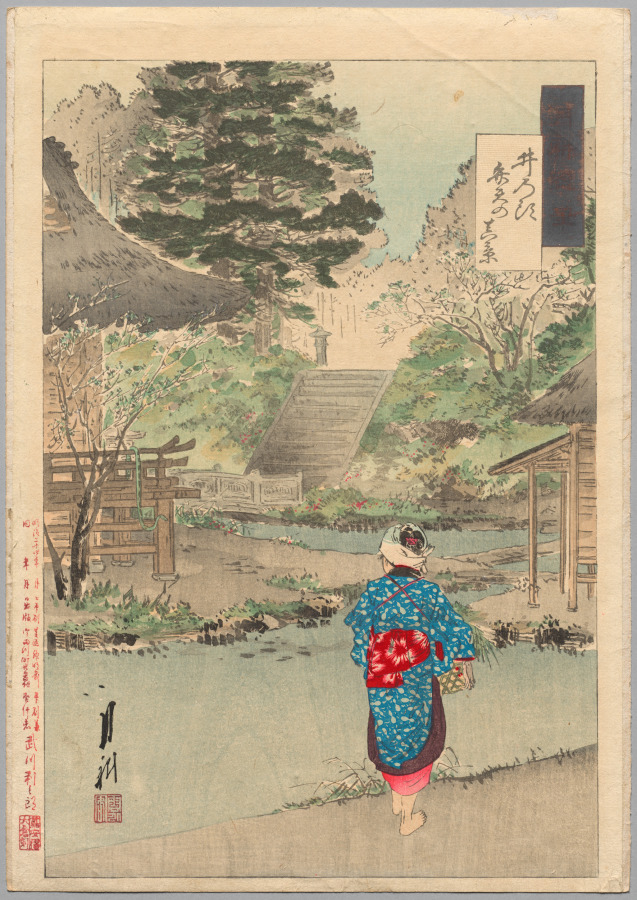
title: True View of Benten at Inokashira from the series Gekkō’s Miscellaney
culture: Japan, Meiji period (1868–1912)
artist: Ōgata Gekkō (Japanese, 1859–1920)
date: c. 1886–1899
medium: Woodblock print, ink and color on paper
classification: Print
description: The print series Gekkō’s Miscellaney wanders through a variety of genres. This print captures a view of a famous place in Tokyo, Inokashira, associated with the water deity Benzaiten. Ōgata Gekkō distinguished himself as a younger artist in the first exhibition of the Painting Appreciation Society (Kangakai) in 1885. He went on to earn prizes at world’s fairs and expositions in both the US and Europe.